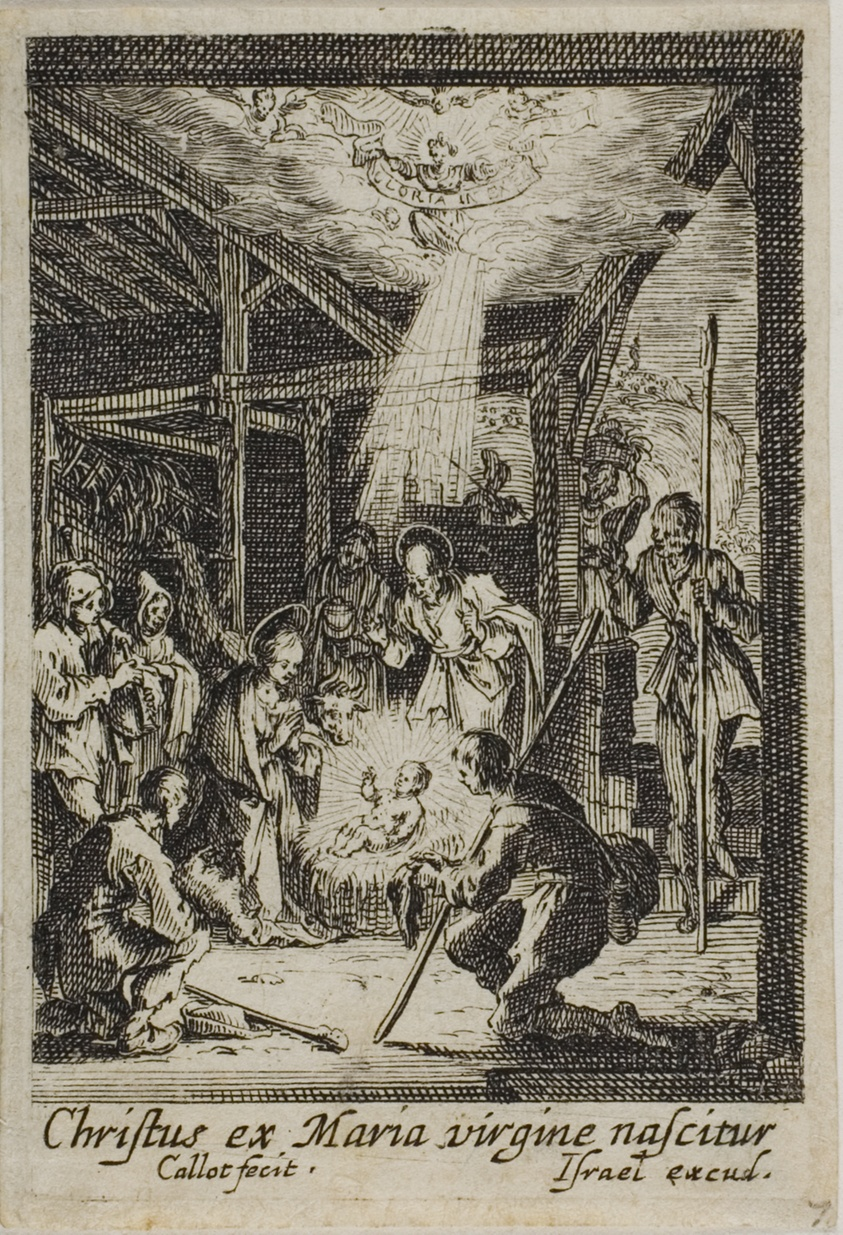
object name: Print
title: The Birth of Jesus, from The Life of the Virgin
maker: Jacques Callot (French, 1592-1635)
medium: Etching on paper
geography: France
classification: etching; print; prints and drawing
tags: nativity scenes, Christian subjects, mythology, prints and drawings, Virgin and child/Madonna and child